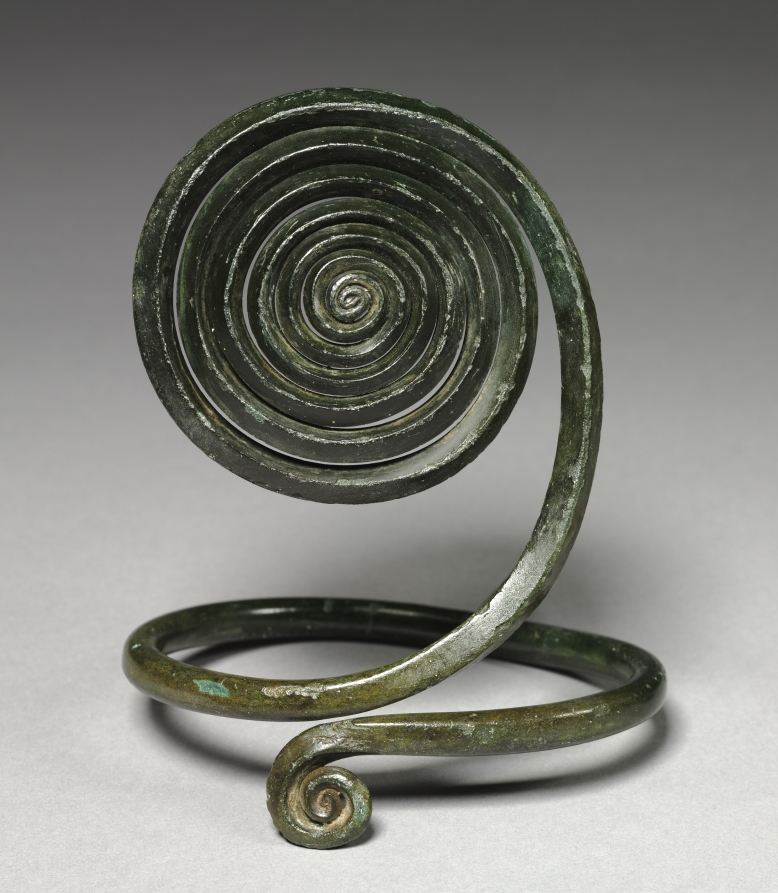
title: Spiral Armilla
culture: Central Europe, Bronze Age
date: c. 1500 BCE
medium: bronze, wrought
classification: Metalwork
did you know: This armilla or arm ornament has a ridge along the spine, ending in a large spiral at one end.